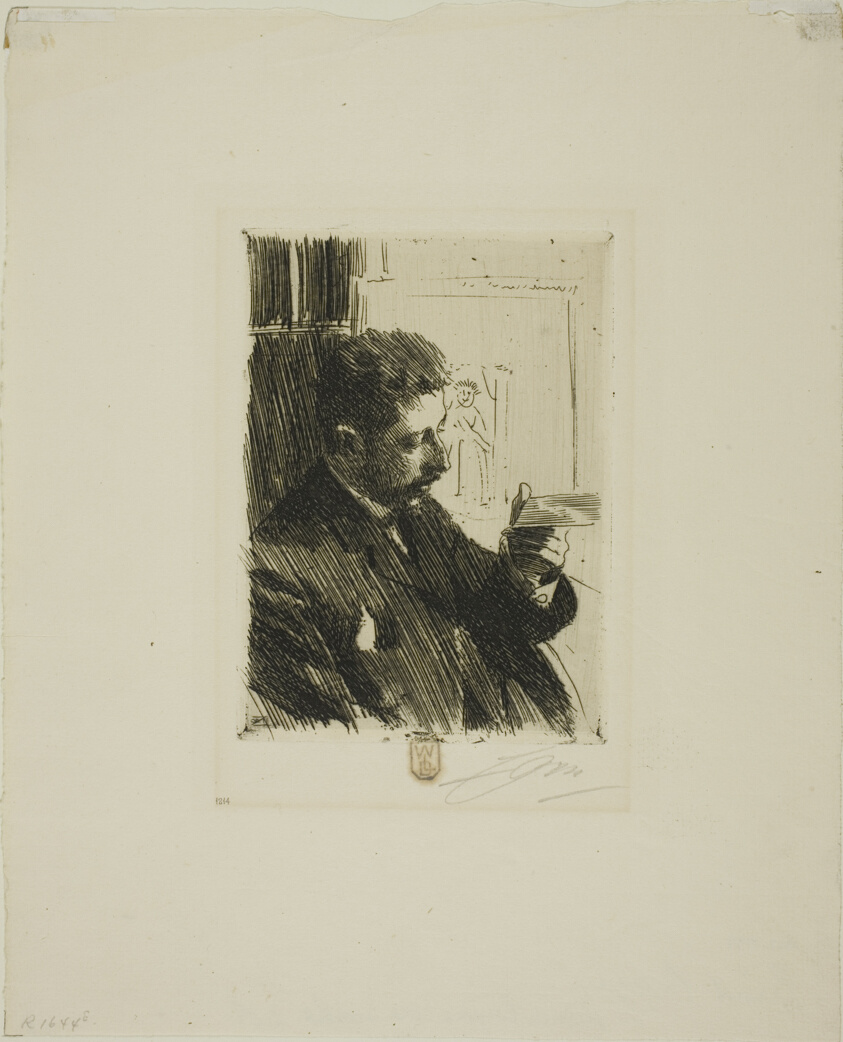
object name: Print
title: H. R. H. Prince Eugen of Sweden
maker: Anders Zorn (Swedish, 1860-1920)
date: 1891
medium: Etching on ivory laid paper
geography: Sweden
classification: etching; print; prints and drawing